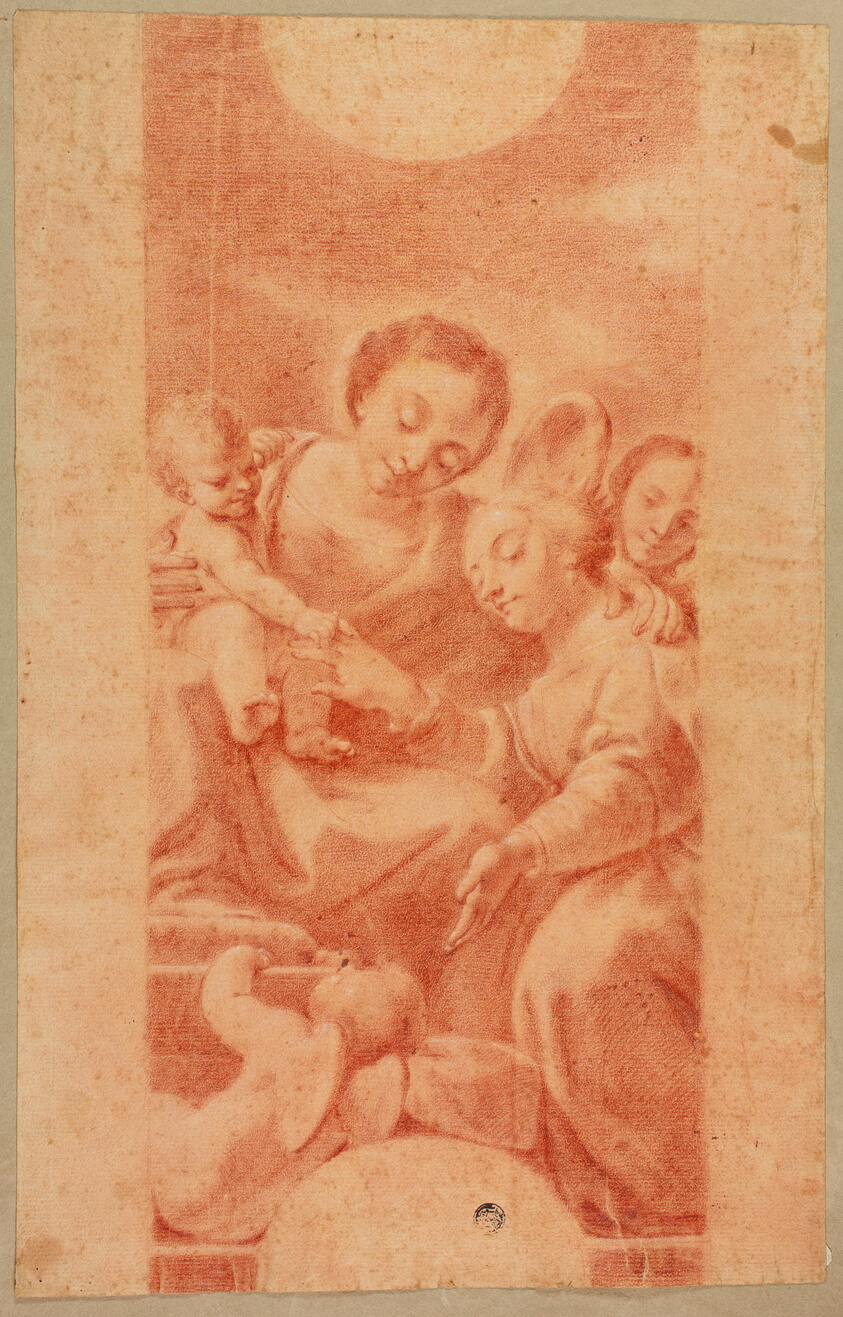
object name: Drawing and Watercolor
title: Mystic Marriage of Saint Catherine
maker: Style of Antonio Allegri, called Correggio (Italian, c. 1494-1534); possibly after Mattia Preti (Italian, 1613-1699)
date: 18th century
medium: Red chalk, with stumping, and brush and red chalk wash, on cream laid paper, tipped onto tan wove paper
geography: Italy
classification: chalk; drawings (visual works); prints and drawing